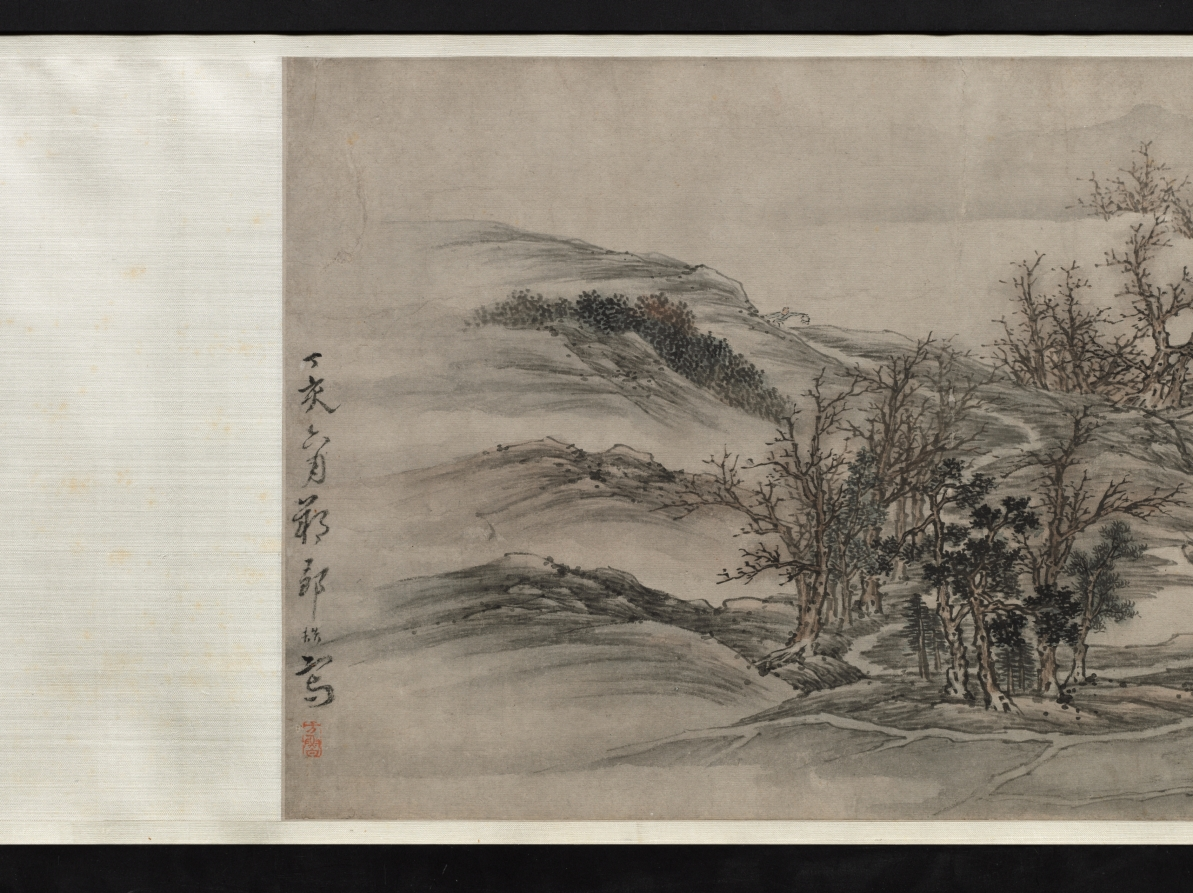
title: Autumn Mist in the Countryside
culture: China, Qing dynasty (1644-1911)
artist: Zou Zhe (Chinese, c. 1610-before 1688)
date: 1647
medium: handscroll, ink and color on paper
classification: Painting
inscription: Artist's inscription, signature, and seal: The first day of the sixth lunar month, the ting-hai year [1647], Tsou Che painted [this]. [seal] Fang-lu.